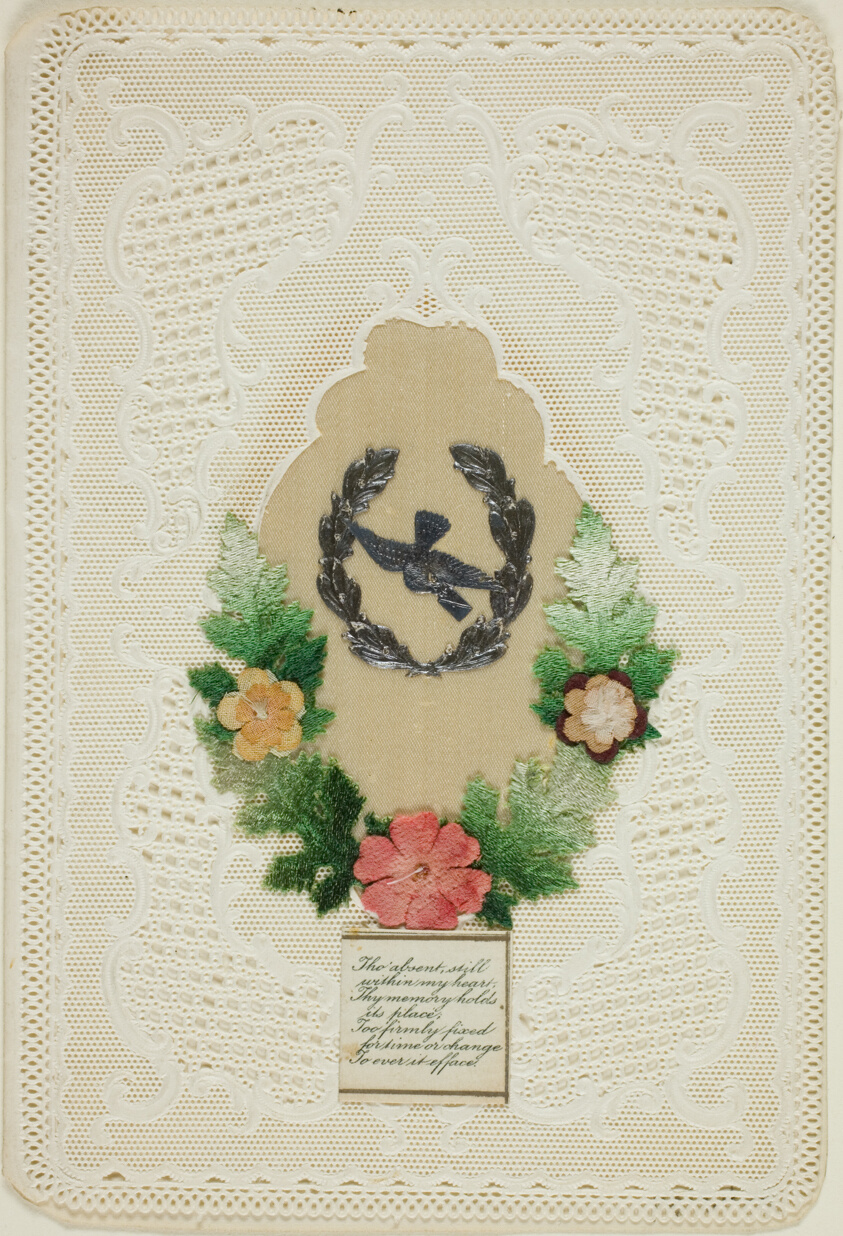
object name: Drawing and Watercolor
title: The Absent Still WIthin my Heart (valentine)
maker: Unknown Artist; English, 19th century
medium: Collaged elements on cut and embossed ivory wove paper (lace)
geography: England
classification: valentine; prints and drawing; paper